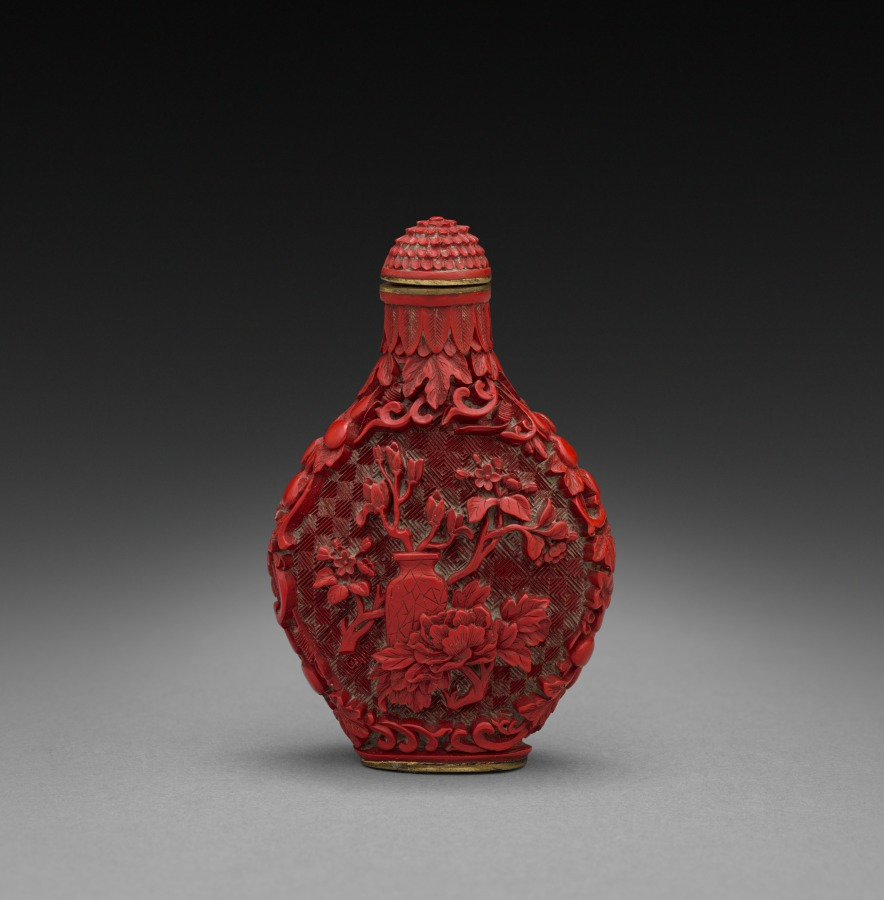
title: Snuff Bottle with Flowers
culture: China, Qing dynasty (1644-1911), Qianlong mark and reign (1736-95)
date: 1736–95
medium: carved cinnabar lacquer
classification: Lacquer